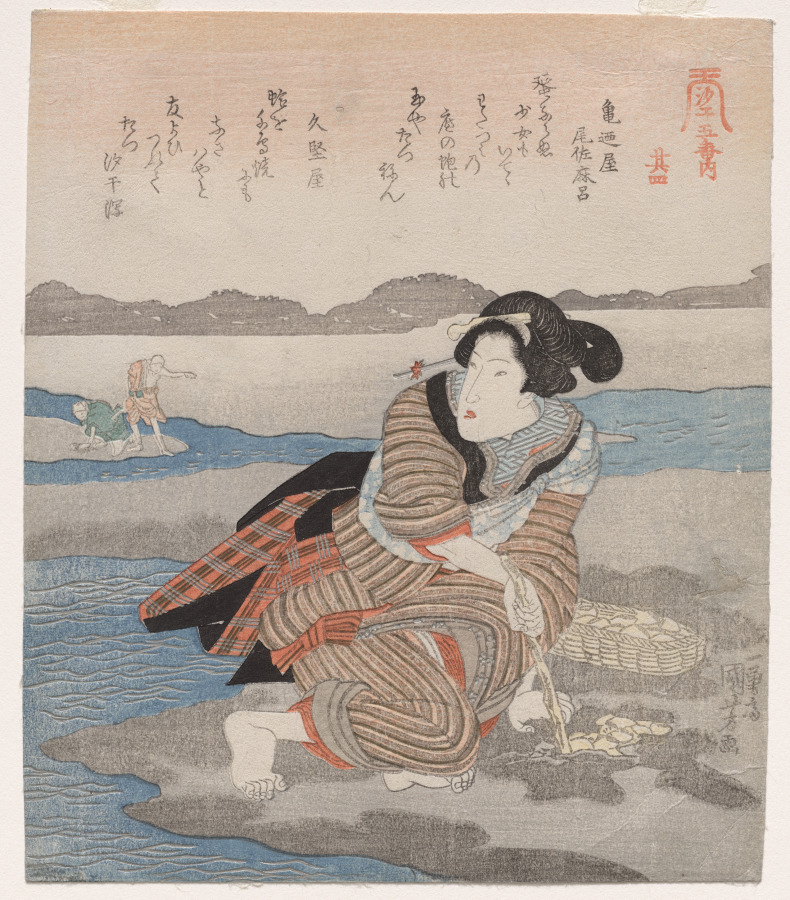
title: Fourth Print from A Low Tide Pentaptych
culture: Japan, Edo period (1615–1868)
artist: Utagawa Kuniyoshi (Japanese, 1797–1861)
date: c. 1830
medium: color woodblock print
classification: Print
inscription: Signature: Ichiyusai Kuniyoshi ga.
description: This is one of five surimono, privately commissioned prints, making up an image of people collecting sea life at low tide. Ten witty poems, written by members of a poetry circle, appear across the upper part of the composition, with two poems on each print. Based in Edo (now Tokyo), the group was led by Hisakataya Misora (active 1810s–30s), who wrote four of the poems. This composition may have been printed in April, which was considered the best time for beachcombing.